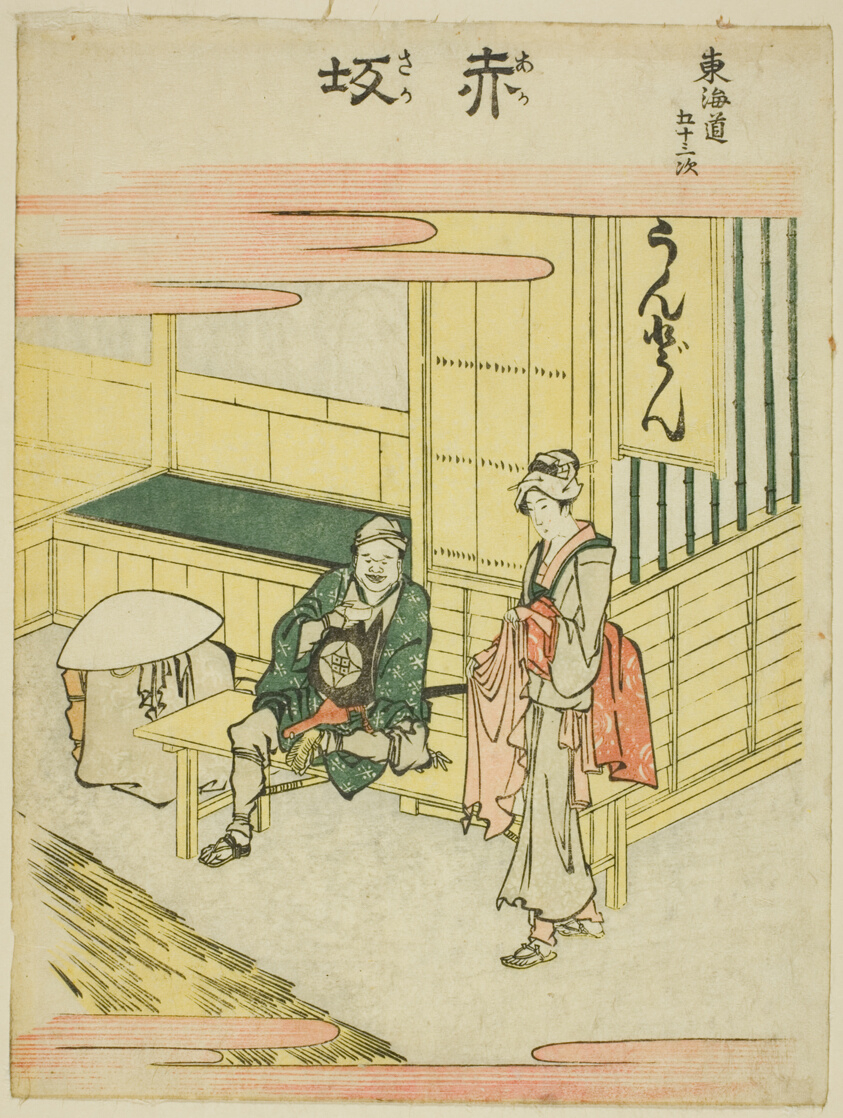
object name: Print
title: Akasaka, from the series "Fifty-three Stations of the Tokaido (Tokaido gojusan tsugi)"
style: Japanese (culture or style)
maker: Katsushika Hokusai 葛飾 北斎; Japanese, 1760-1849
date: c. 1806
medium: Color woodblock print; chuban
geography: Japan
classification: woodblock print; print; asian art